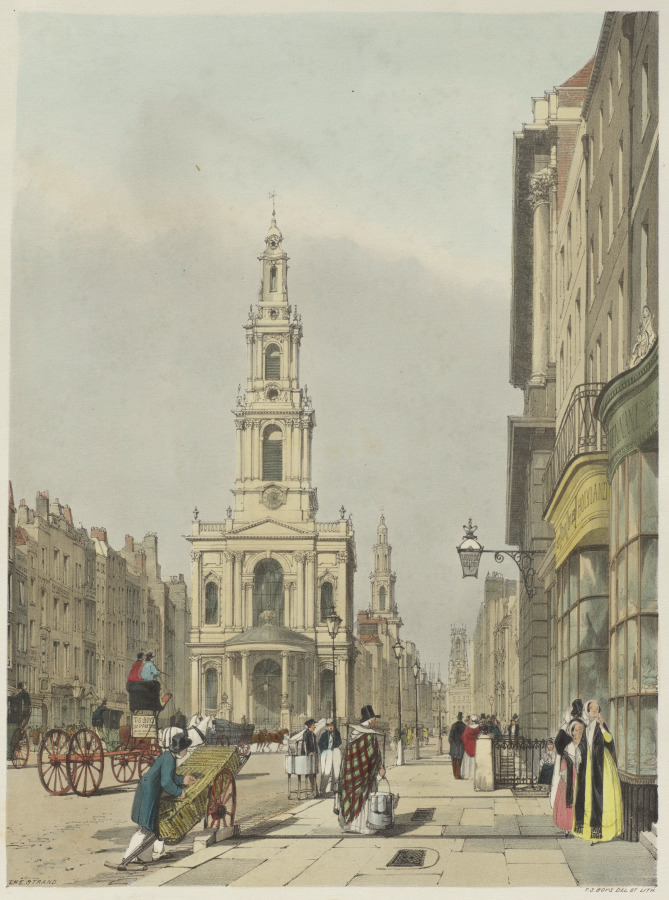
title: London As It Is: The Strand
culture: England, 19th century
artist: Thomas Shotter Boys (British, 1803–1874)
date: 1842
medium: lithograph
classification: Bound Volume